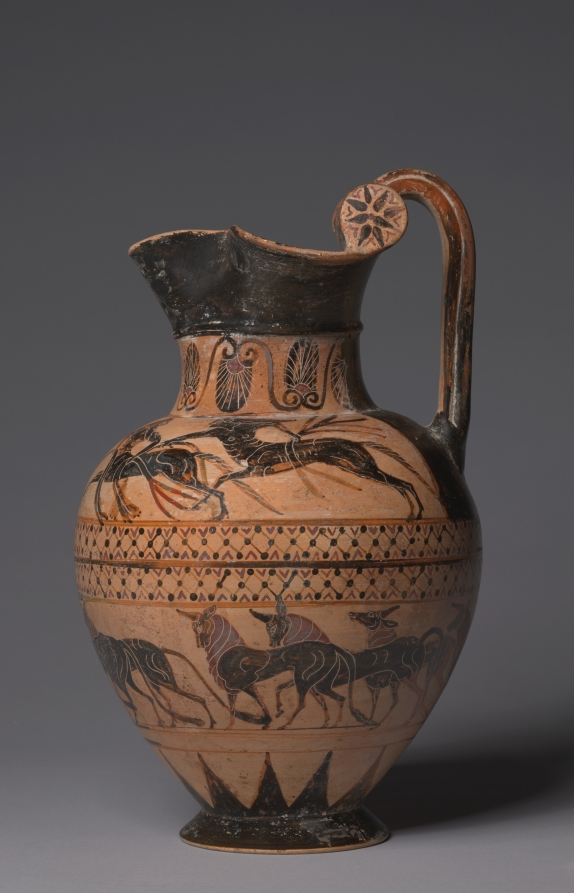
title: Black-Figure Oinochoe (Wine Jug): Hercle (Herakles) and Pholos; Cattle (of Geryon?)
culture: Etruscan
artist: attributed to Tityos Painter (Etruscan, active at Vulci c. 530–510 BCE)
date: c. 520 BCE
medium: ceramic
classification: Ceramic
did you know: This oinochoe or wine pitcher is a type of pottery made by the Etruscans or pre-Italic peoples.